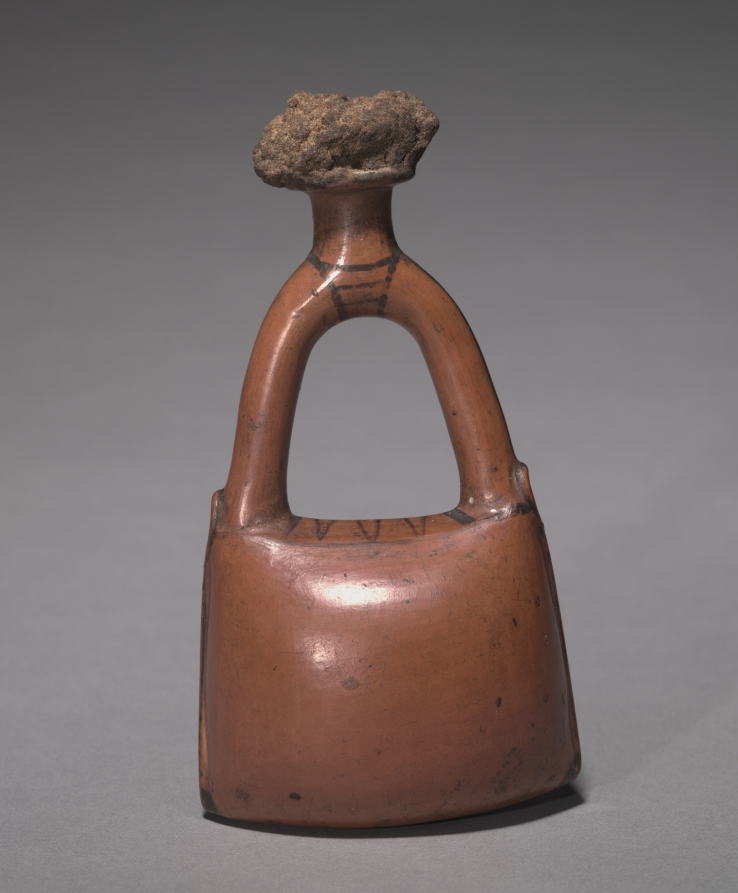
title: Flask in the Form of a Leather Bag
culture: Egypt, New Kingdom (1540–1069 BCE), Dynasty 18, reign of Tuthmosis III (1479–1425 BCE)–reign of Amenhotep III (1390–1352 BCE)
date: c. 1415–1381 BCE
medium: Nile silt ware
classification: Vessels